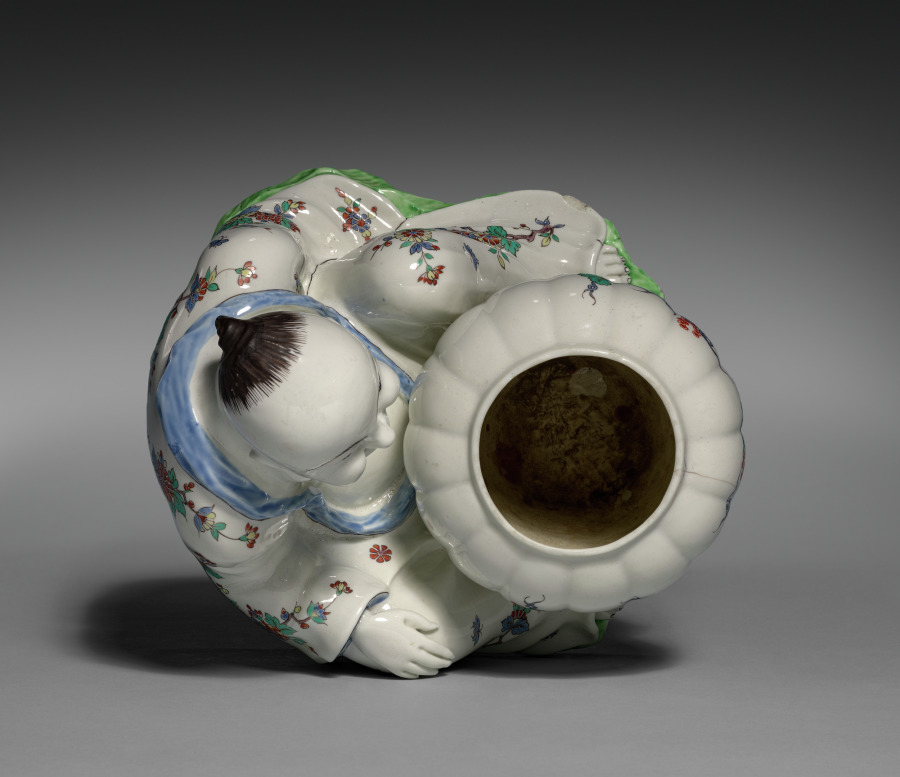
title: Figure of a Chinese with Jar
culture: France, Chantilly, 18th century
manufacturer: Chantilly Porcelain Factory (French)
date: c. 1735– 1740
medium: soft-paste porcelainwith enamel decoration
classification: Ceramic